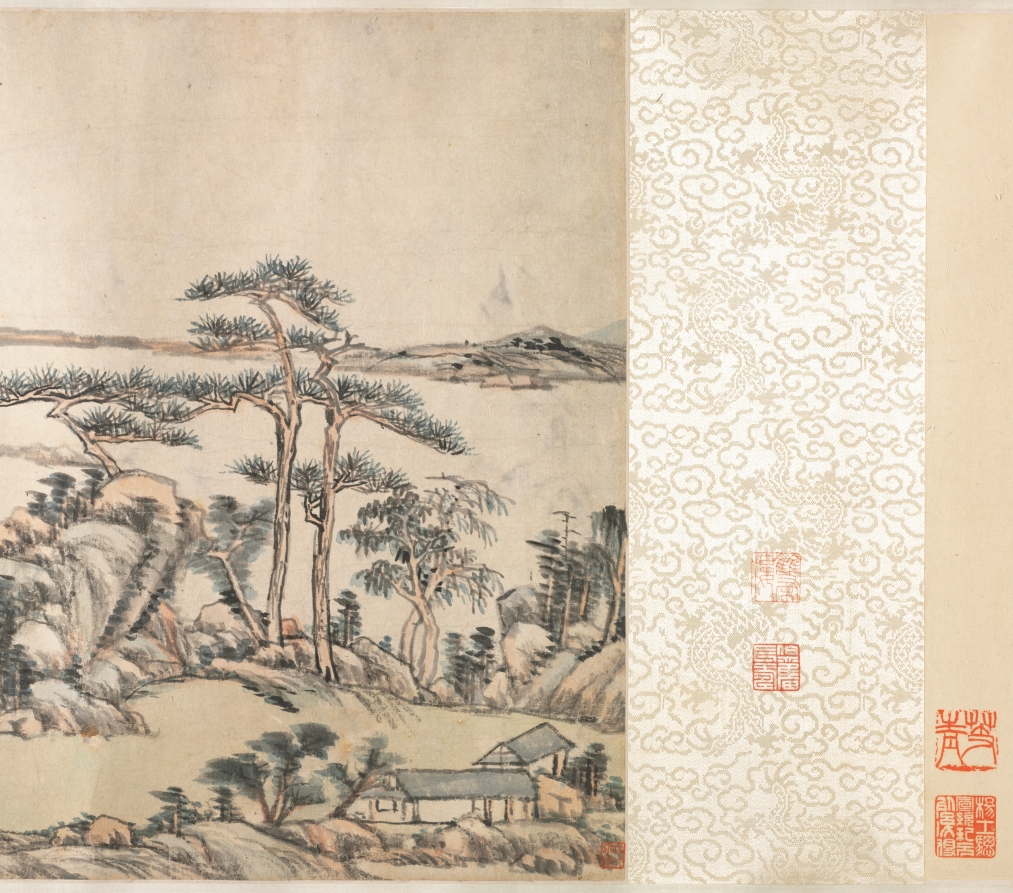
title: Green Peaks under Clear Sky: After Huang Gongwang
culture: China, Qing dynasty (1644-1911)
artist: Wang Yuanqi (Chinese, 1642–1715)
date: 1703–8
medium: handscroll; ink and light color on paper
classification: Painting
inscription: 晴巒霽翠：倣黃子久。麓臺。[印]石師道人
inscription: [印] 御書畫圖留與人看. 子久畫於宋諸大家荊、關、李、范、董、巨，無所不有。運筆不假修飾。皴法由淡入濃，化諸家之迹者也。澹明徐君偶見縮本，臨摹六幅。囑余參以富春大意，成一長卷。余夙夜在公，乘暇偶一點染。至戊子九秋告竣，閱四、五年矣。昔大癡為無用師作富春卷，七年而成，為千古鉅觀。今拙筆癡鈍。亦淹留至此。可為識者噴飯矣。王原祁題。[印]王原祁印; 麓臺 [印, 畫芯左下] 西廬後人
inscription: 3 additional colophons and 15 additional seals: 1 colophon and 9 seals of Yang Shicong 楊士驄 (b. 1870); 1 colophon of Wu Hufan 吳湖帆 (1894–1968); 1 colophon and 1 seal of Wu Mei (20th c.); 5 seals of Cheng Qi 程琦 (1911–1988).